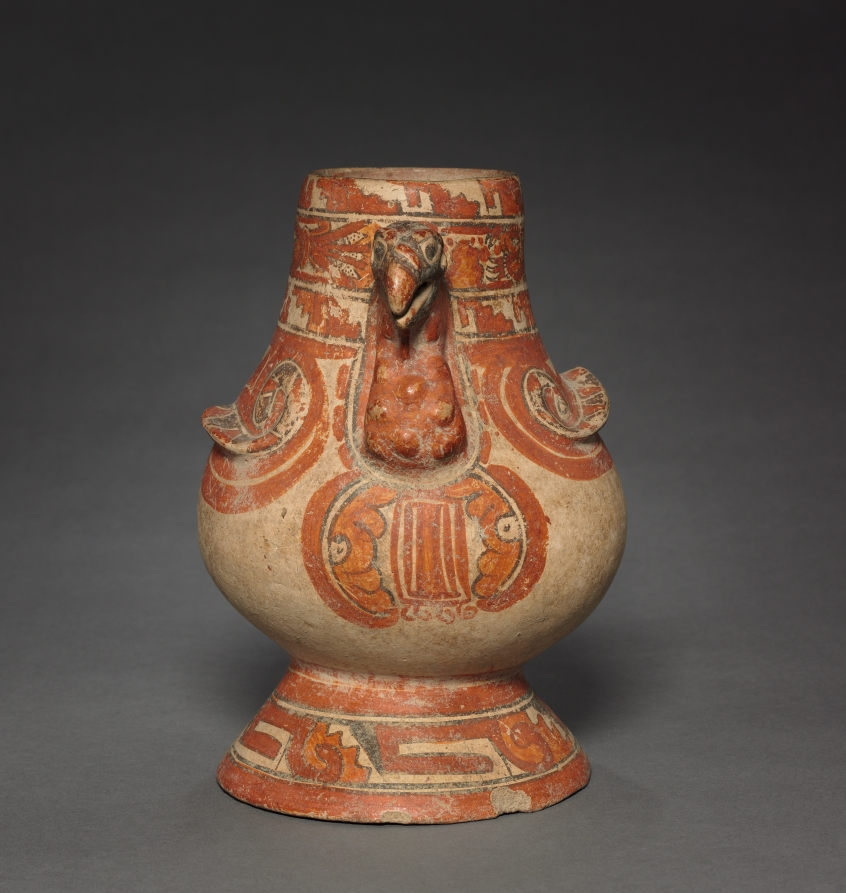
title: Turkey Vessel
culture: Costa Rica, Southern Nicoya region, Pataky Polychrome style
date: c. 1000–1550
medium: ceramic, slip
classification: Ceramic